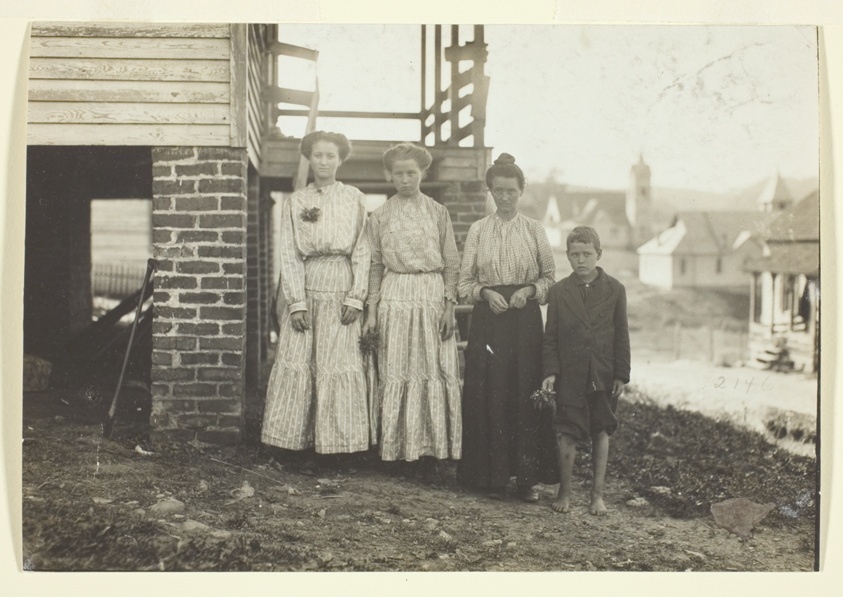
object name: Photograph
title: Fries, Virginia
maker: Lewis Wickes Hine (American, 1874–1940)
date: May 1911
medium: Gelatin silver print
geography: United States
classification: gelatin silver (developing-out-paper) pr; photographic process; photography; photograph